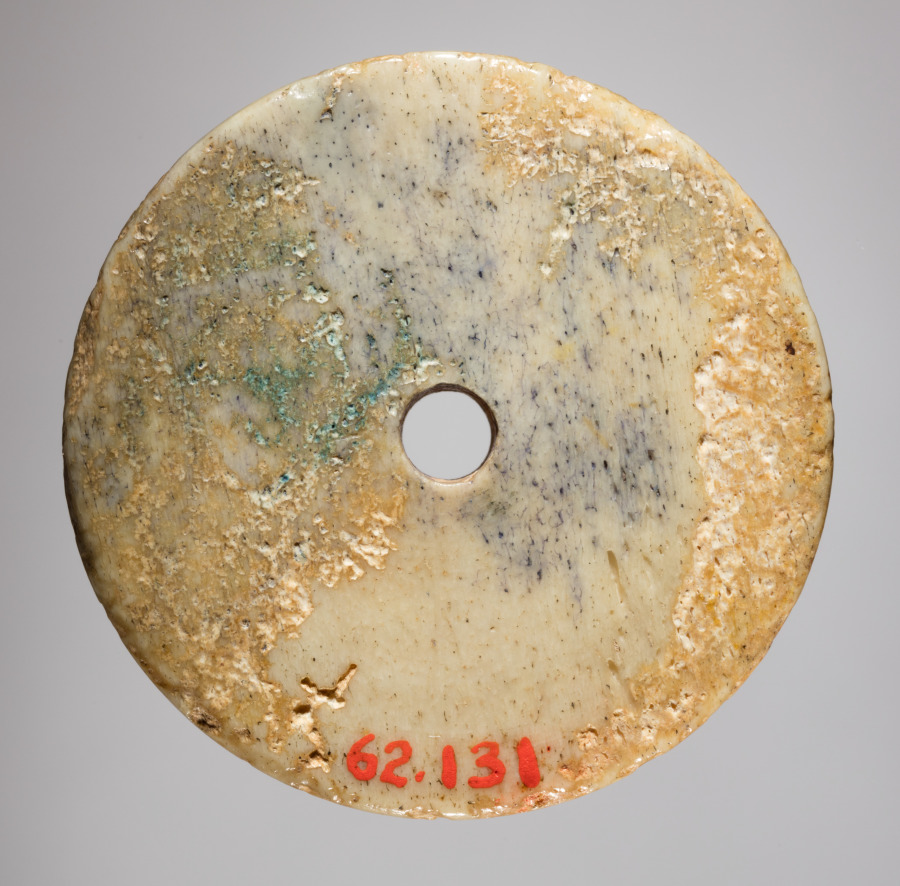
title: Spindle Whorl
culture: Iran, early Islamic period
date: 700s - 900s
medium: bone, incised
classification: Spindle Whorl